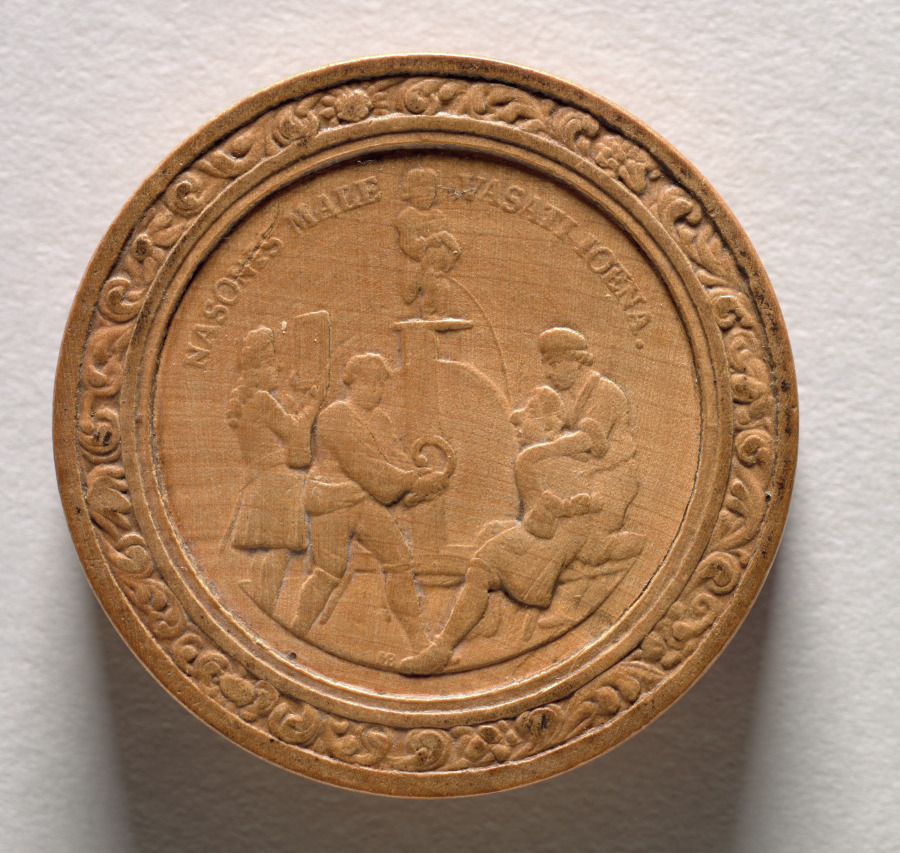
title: Gaming Piece (obverse)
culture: Germany, late 17th-early 18th Century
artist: Martin Brunner (German, 1659–1725)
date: c.1700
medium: wood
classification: Furniture and woodwork